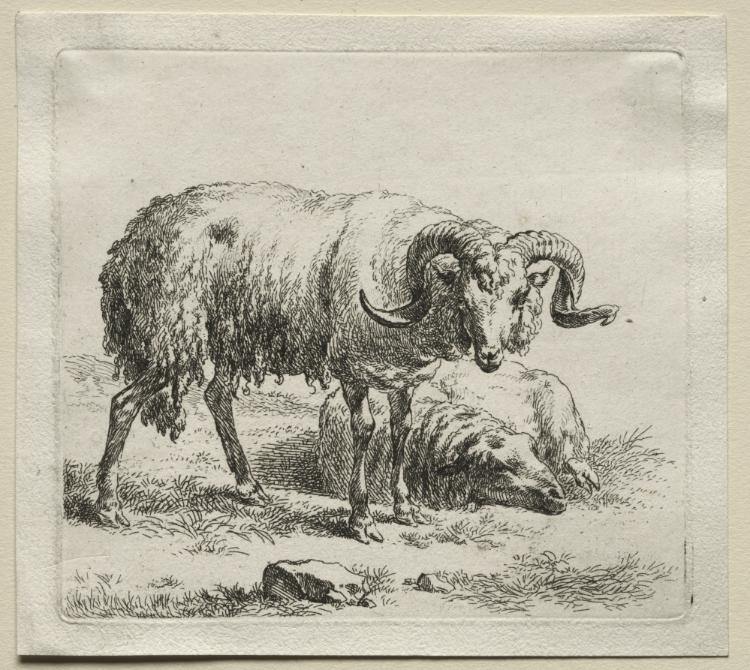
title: Animalia: Ram and Sheep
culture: Netherlands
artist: Nicolaes Berchem (Dutch, 1620–1683)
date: 1635–83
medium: etching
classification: Print